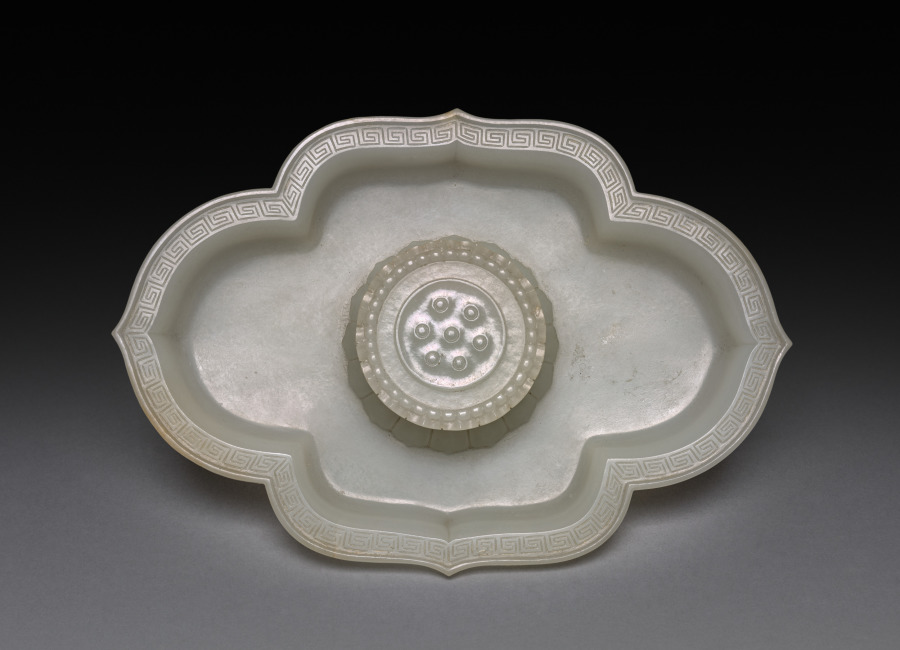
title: Lotus-shaped Dish and Cup (dish)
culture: China, Qing dynasty (1644–1911), Qianlong reign (1736–95)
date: 1736–95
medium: jade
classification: Jade